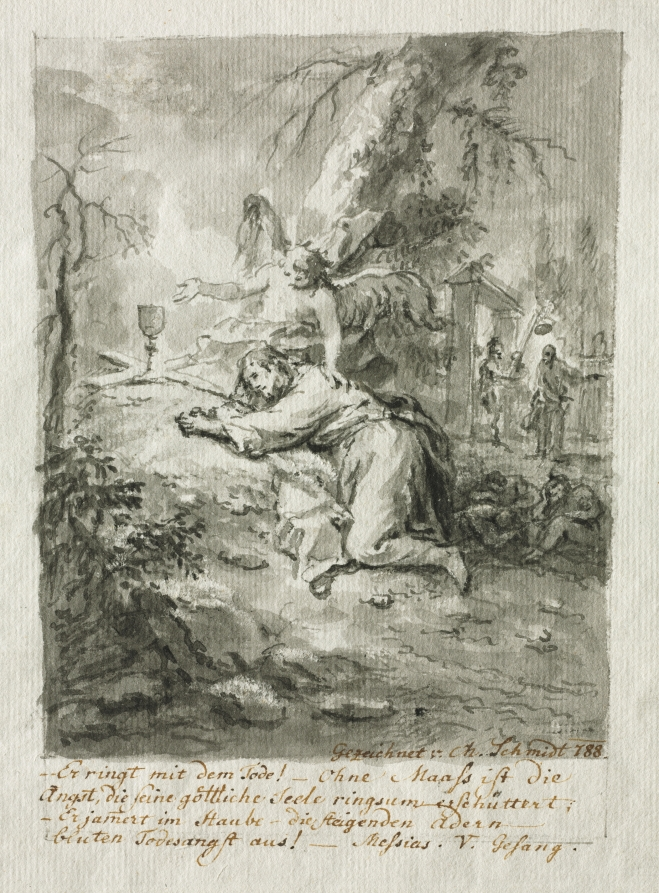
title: Christ on the Mount of Olives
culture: Germany, 18th century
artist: Martin Johann Schmidt (Austrian, 1718–1801)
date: 1788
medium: brush and gray ink and gray wash with black chalk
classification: Drawing